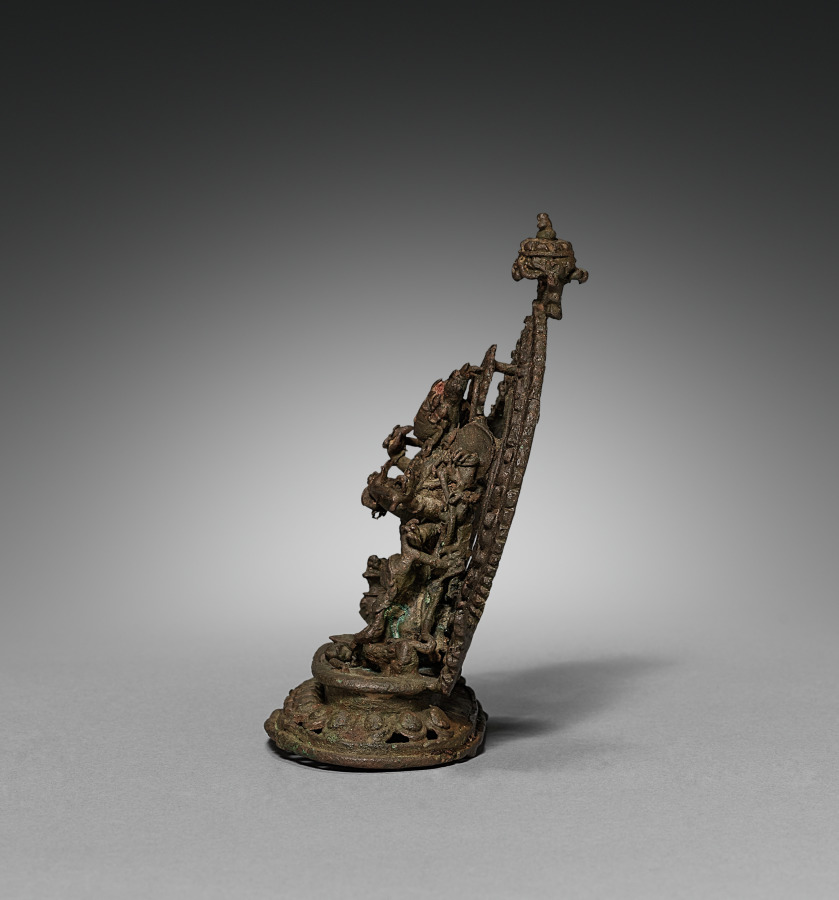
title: Durga Slaying the Demon Buffalo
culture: Nepal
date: 1500s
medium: bronze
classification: Sculpture